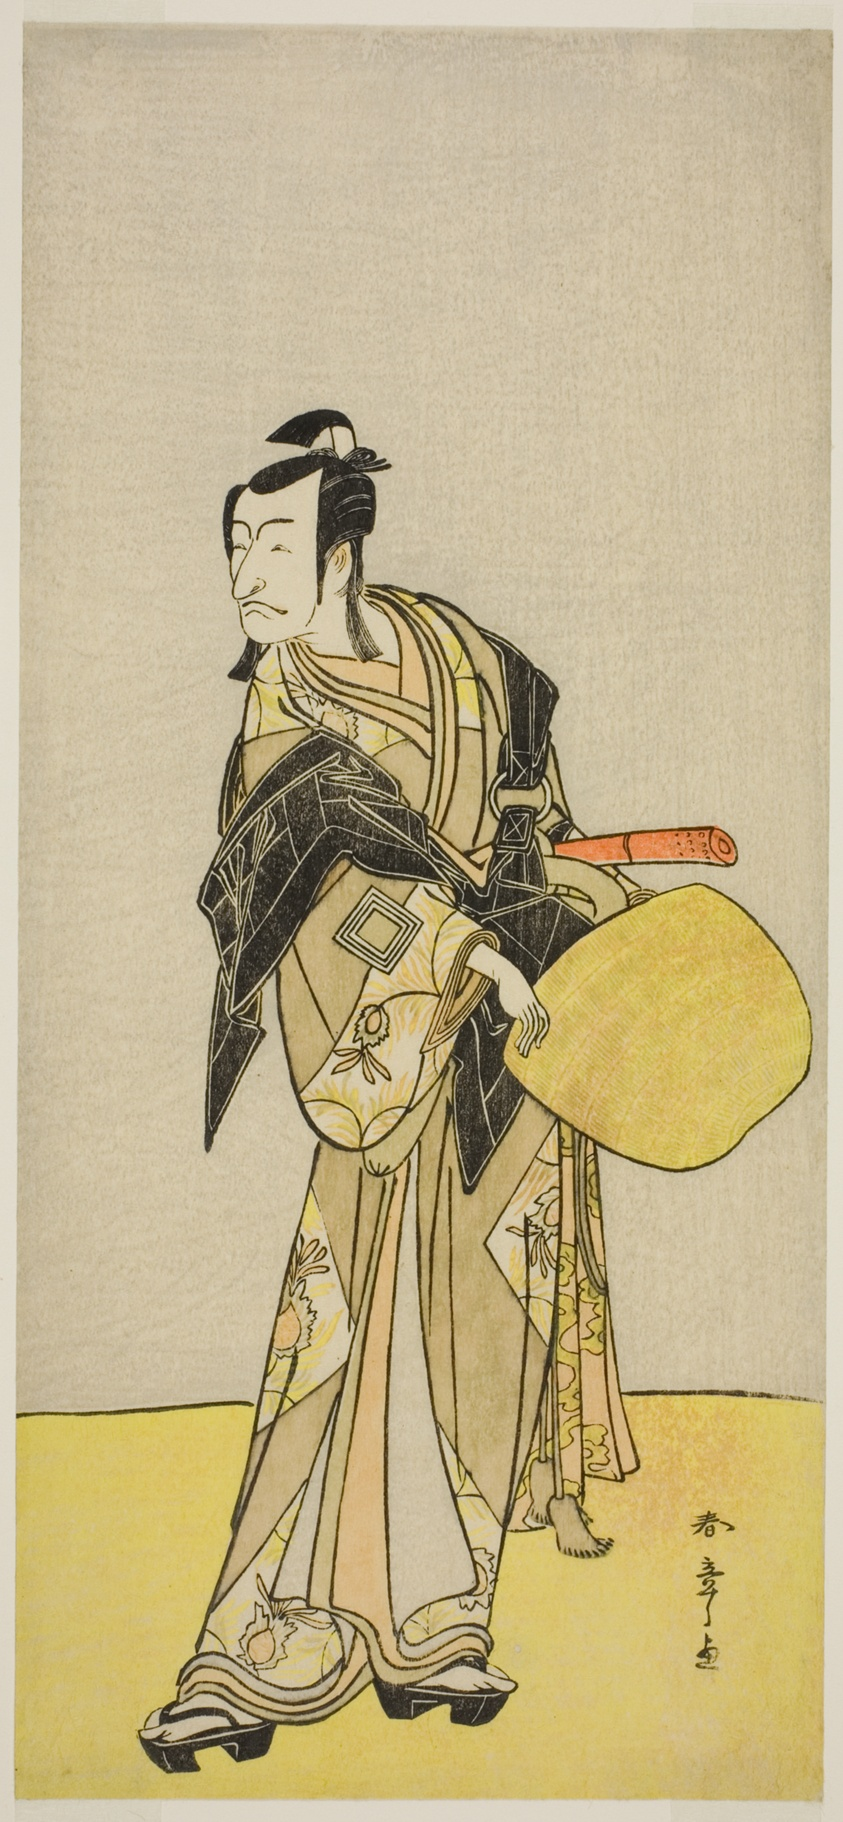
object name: Print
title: The Actor Ichikawa Danjuro V as Kakogawa Honzo, from the play "Kanadehon Chushin Nagori no Kura," performed at the Nakamura Theater in the ninth month, 1780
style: Japanese (culture or style)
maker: Katsukawa Shunsho 勝川 春章; Japanese, 1726-1792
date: c. 1780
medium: Color woodblock print; hosoban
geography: Japan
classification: woodblock print; print; asian art